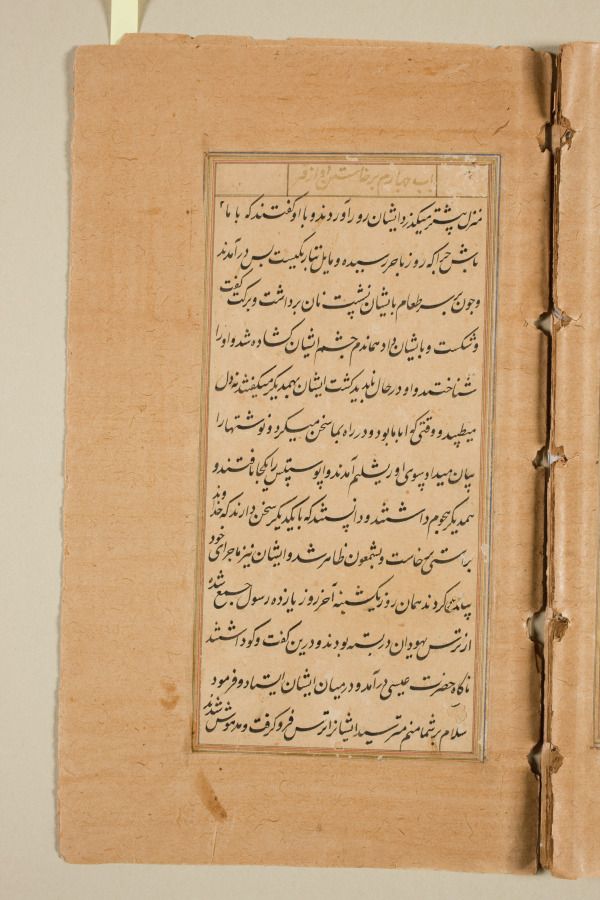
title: Text page from a Mirror of Holiness (Mir’at al-quds) of Father Jerome Xavier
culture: Mughal India, Allahabad, made for Prince Salim (1569–1627)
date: 1602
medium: Ink and gold on paper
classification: Manuscript